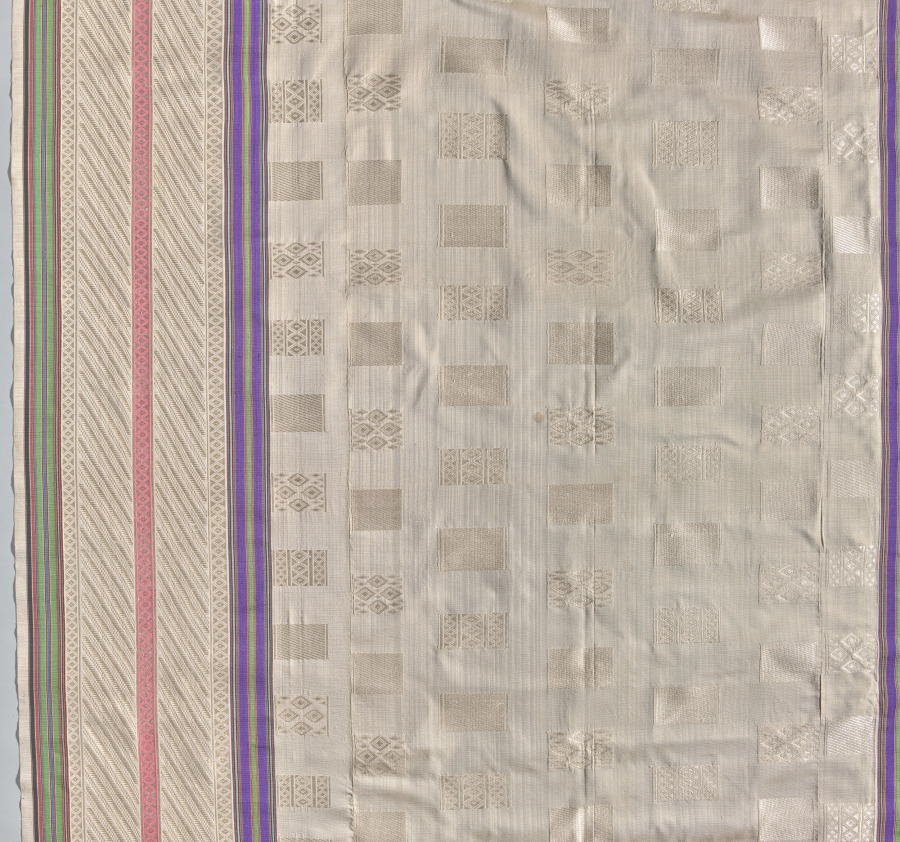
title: Wrapper (Lamba Akotifahana)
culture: Madagascar, Merina Kingdom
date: 1860–90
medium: silk (Bombyx mori and Borocera cajani)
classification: Textile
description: A lamba is an untailored textile worn by all ages, classes, and genders across much of Madagascar. Woven from shining Bombyx mori silk, the lamba akotifahana takes its name from the weft-float motifs (akotifahana) that adorn it. Once the color of commoners and the enslaved, when Christianity became the state religion in 1869, elite churchgoers preferred white silk lambas. The rows of knotted fringe reflect Malagasy taste for Chinese-made “Manila shawls.”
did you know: A shining lamba like this was wrapped around the shoulders over tailored clothing like a suit or dress.